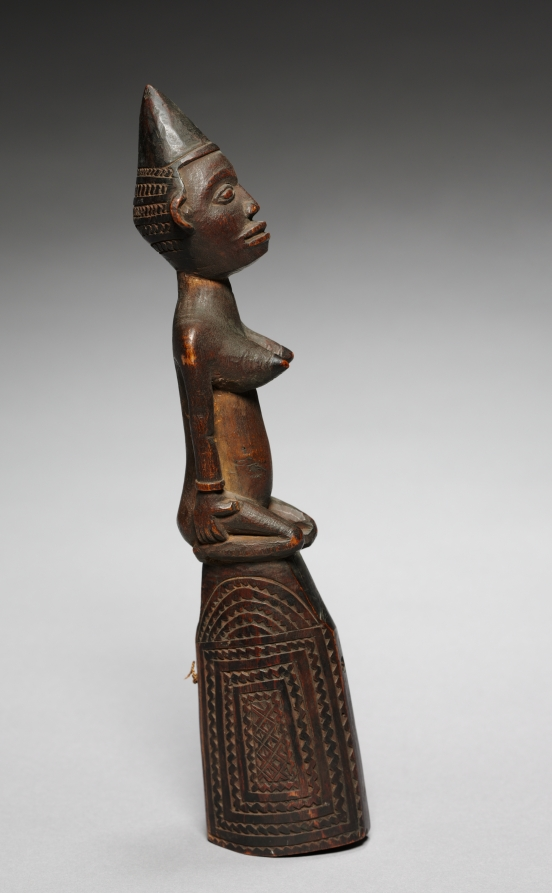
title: Bell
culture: Africa, Central Africa, Democratic Republic of the Congo, or Republic of the Congo, Kongo-style or Vili-style maker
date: early 1900s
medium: Wood and plant fiber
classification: Sculpture